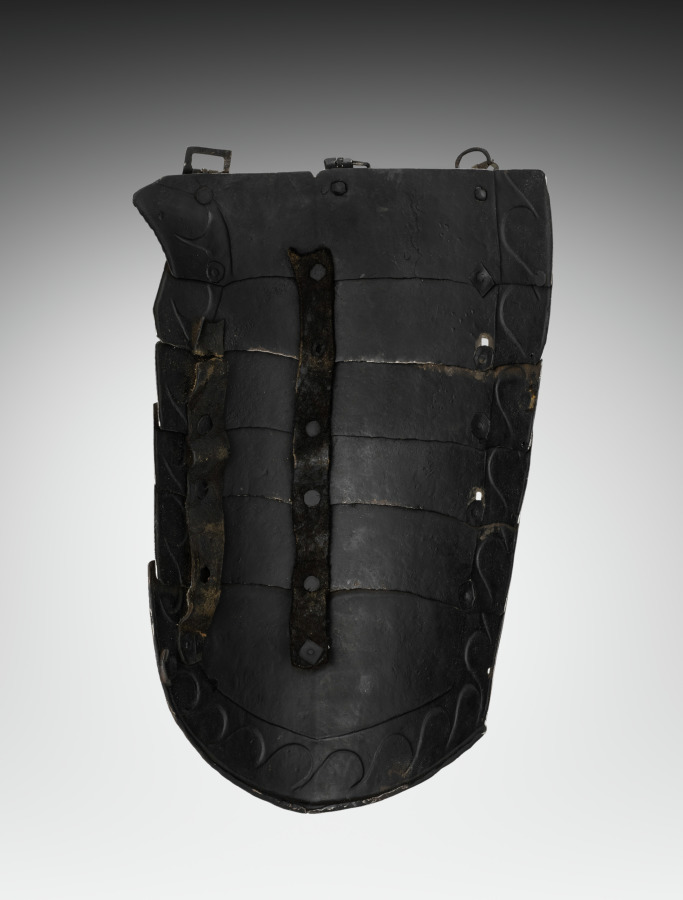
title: Tasset (1 of 2)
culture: Germany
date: c. 1540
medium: steel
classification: Arms and Armor